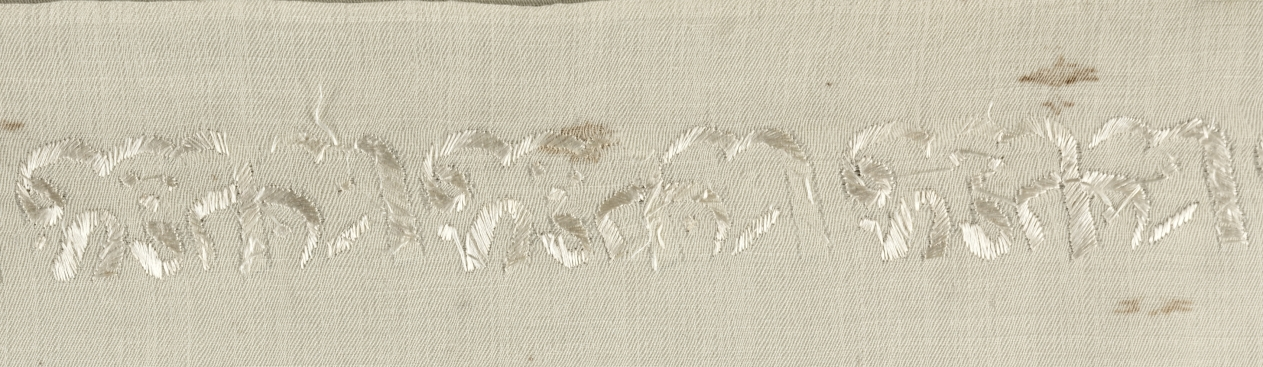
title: Embroidered Robe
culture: Turkey, 19th century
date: 19th century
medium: embroidery; silk on wool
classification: Garment